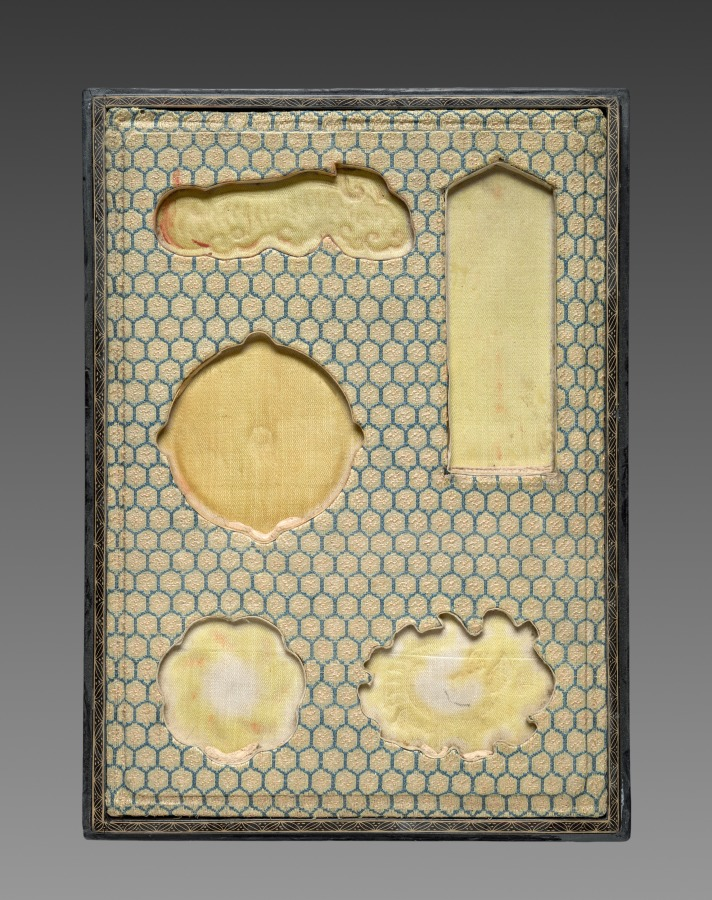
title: Box with Ink Cakes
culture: China, Qing dynasty (1644-1911), Jiaqing reign (1795-1820)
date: 1795–1820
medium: lacquer and silk box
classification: Lacquer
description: Ink cakes (also called ink sticks) are dissolved with the addition of water and then ground on the surface of a flat square stone into liquid ink for painting and calligraphy. The precious ink cakes here, however, have never been used. The inscription on the side of the blue ink cake says that the set was commissioned by Chen Huai, Governor of Jiangxi Province.